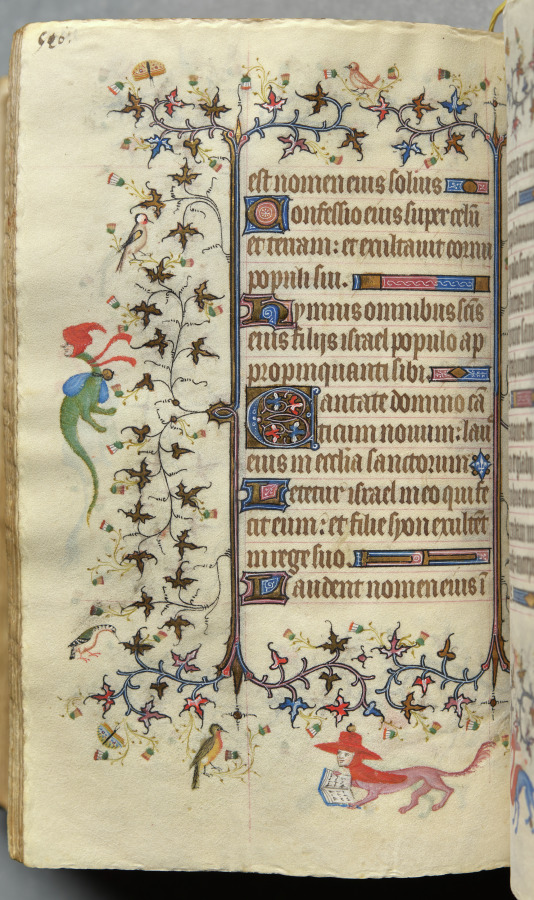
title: Hours of Charles the Noble, King of Navarre (1361-1425): fol. 249v, Text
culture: France, Paris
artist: Master of the Brussels Initials and Associates (French)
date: c. 1405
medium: ink, tempera, and gold on vellum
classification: Bound Volume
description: This precious volume was obviously highly prized by its owner, the French-born King of Navarre, who had his coat of arms painted on no less than twenty folios. Rather than directly commissioning this manuscript from a specific workshop, it seems that Charles the Noble acquired his book of hours -- perhaps ready-made for the luxury market -- while on a trip to Paris in 1404-05. A collaborative effort, six painting styles are evidenced within the pages of this codex, those of two Italians, two Frenchmen, and two Netherlanders. The painter who was responsible for the planning and decoration of the book, and who produced seventeen of the large miniatures, was a Bolognese artist known as the Master of the Brussels Initials. His principal assistant, responsible for most of the borders, was a Florentine who signed his name "Zecho" da Firenze on folio 208 verso.